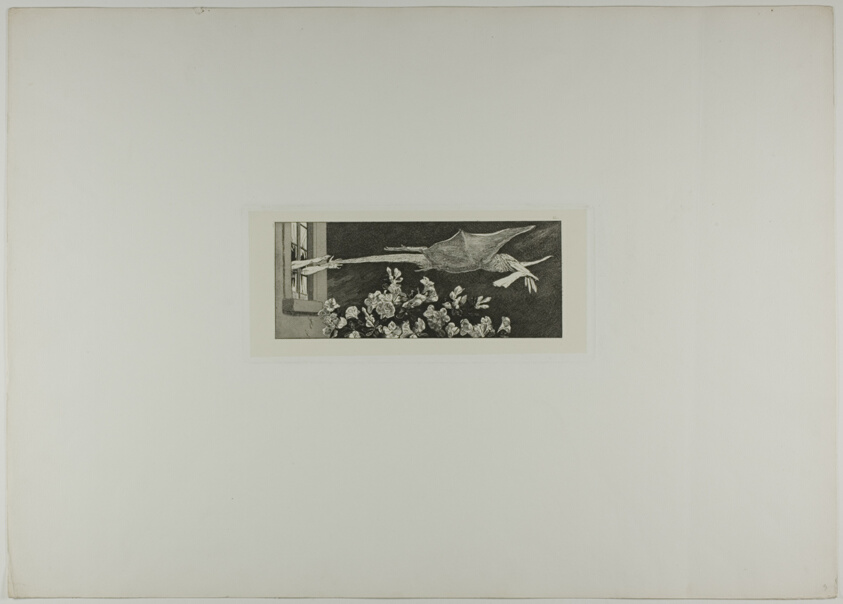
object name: Print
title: Abduction, plate nine from A Glove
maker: Max Klinger (German, 1857-1920)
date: 1881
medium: Etching and aquatint on ivory chine collé on off-white wove paper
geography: Germany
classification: etching; print; prints and drawing